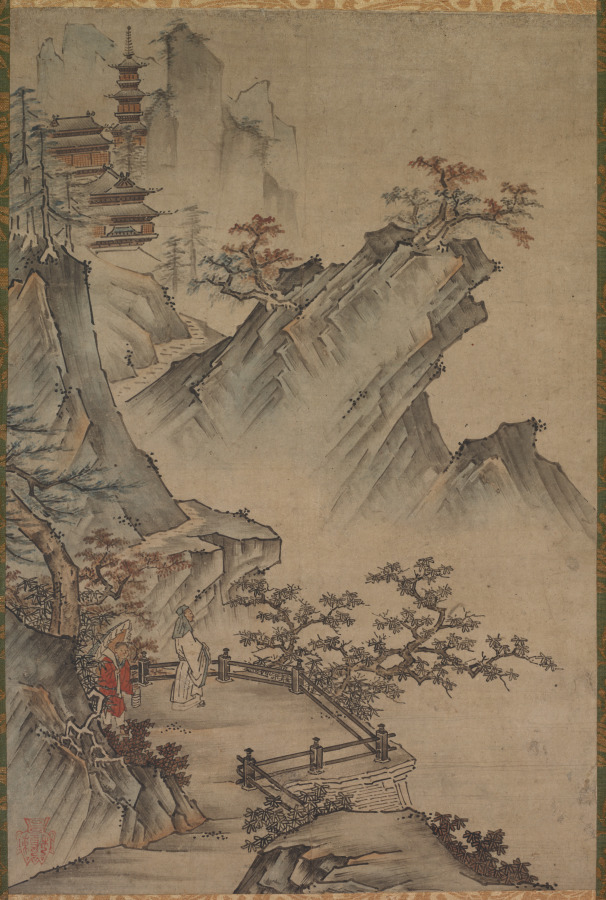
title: Chinese Literatus Viewing a Valley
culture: Japan, Muromachi period (1392–1573) to Edo period (1615–1858)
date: possibly mid- to late 1500s–1600s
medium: hanging scroll; ink and light color on paper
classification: Painting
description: This painting depicts a well-recognized scene in East Asian painting most often associated with the Chinese Southern Song dynasty painter Ma Yuan: a figure, most likely a retired government official, contemplating a high mountain valley from a scenic overlook. The lower left corner of the painting has a tripod-shaped seal resembling that of Kano Hideyori. The work appears to have either been made or repurposed to hang as a pair with a painting by Hideyori.